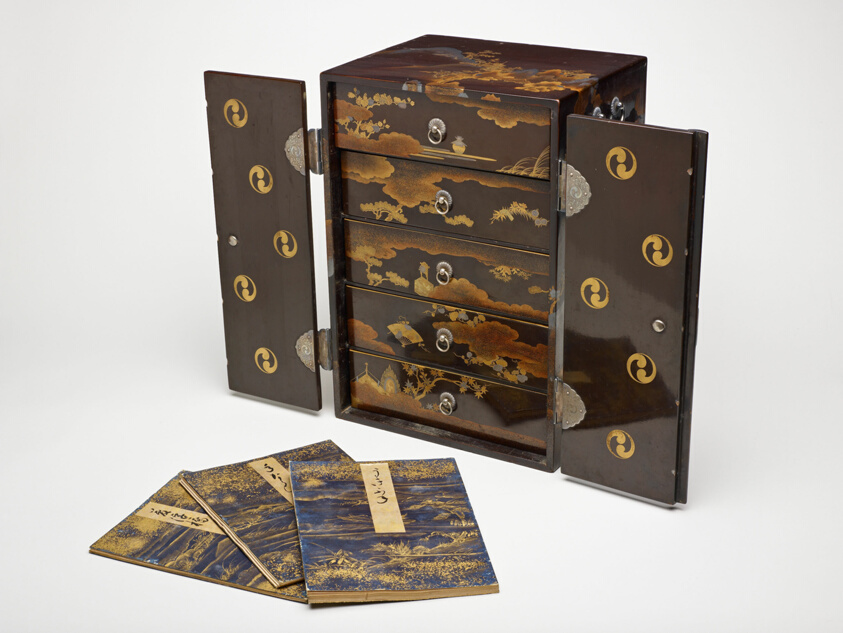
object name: Book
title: Tale of Genji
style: Japanese (culture or style)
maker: Japanese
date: 18th/19th century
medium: Books: Ink on paper with indigo-dyed paper covers with gold painted designs; Case: Lacquer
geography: Japan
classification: book